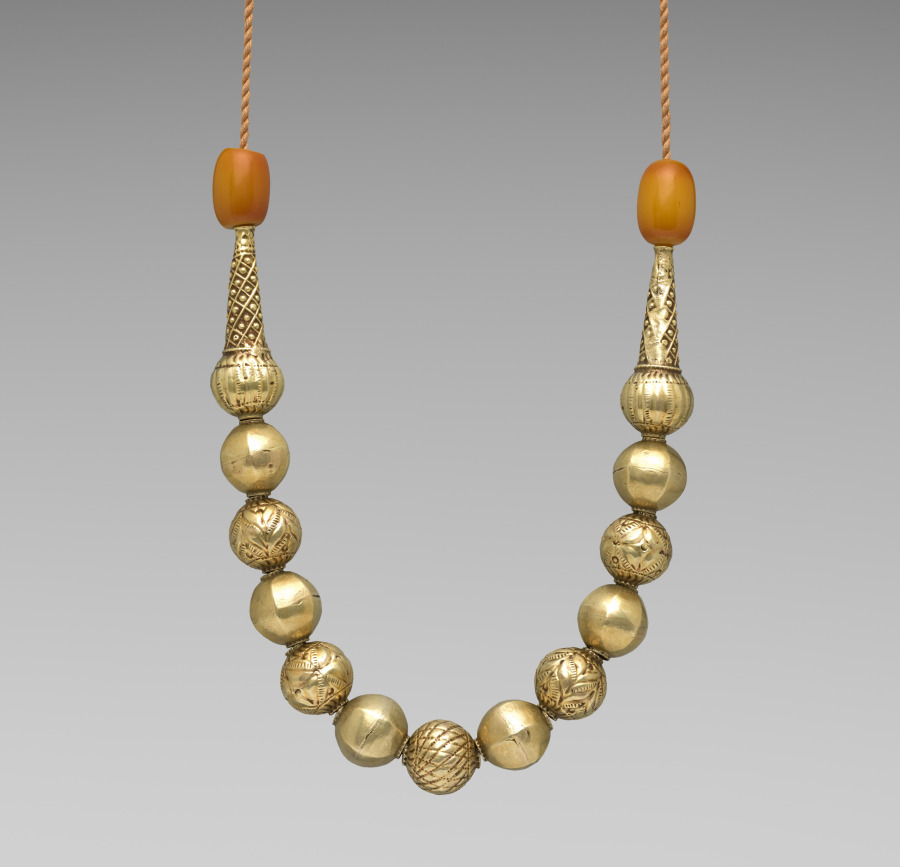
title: Necklace (muriya or murriyya)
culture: Africa, East Africa, probably Harar, Ethiopia, unknown silversmith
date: late 1800s or early 1900s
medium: gilt silver, tree resin (possibly copal)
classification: Jewelry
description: This necklace is from is from the Ethiopian city of Harar, where it was worn only by Muslim women. It was part of the bridal trousseau. The spherical silver beads of this muriya necklace resemble Muslim prayer necklaces. Its warm yellow Baltic amber or Zanzibari copal simultaneously conveyed the wearer’s married status and her access to imported goods. Ornate filigree jewelry was historically made in Ethiopia for royals and nobility by specialized silversmiths trained through long apprenticeships. Customers were generally female, while silversmiths are always male.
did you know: Besides archaeological examples, the oldest known Ethiopian jewelry dates from the 1840s; damaged items were typically melted down to make new pieces or to use during times of hardship.